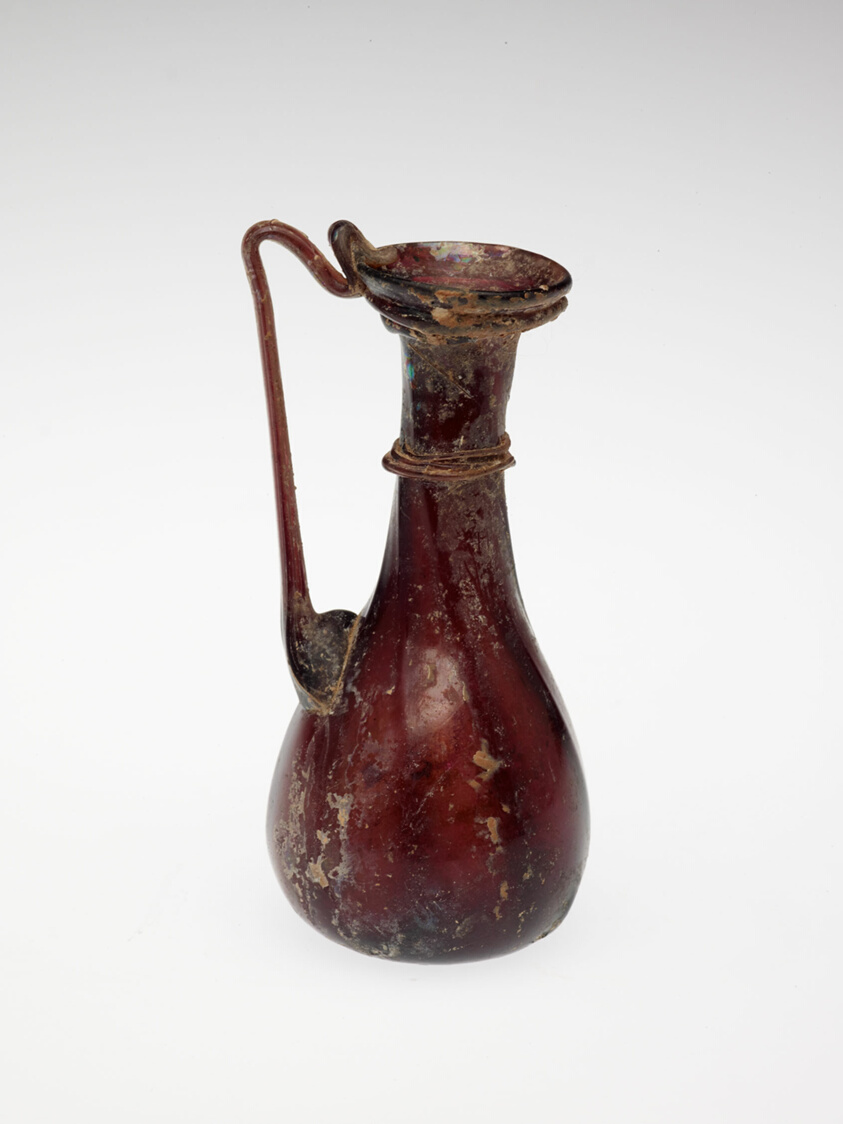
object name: Vessel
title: Jug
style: syrian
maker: Late Roman or Byzantine; Eastern Mediterranean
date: 4th century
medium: Glass, blown technique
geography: Syria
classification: vessel; glass; ancient art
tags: vessels